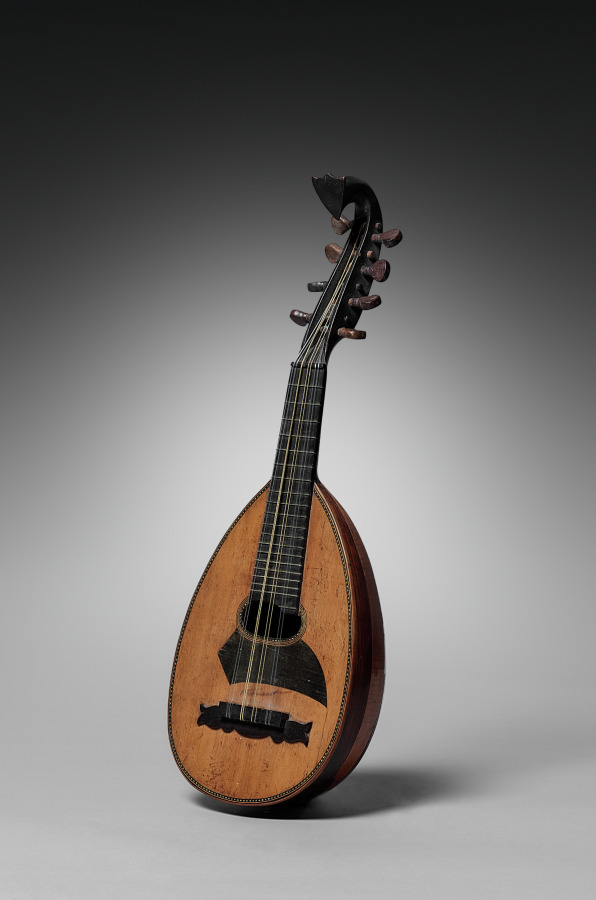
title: Mandore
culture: probably France, 19th century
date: c. 1800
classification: Musical Instrument